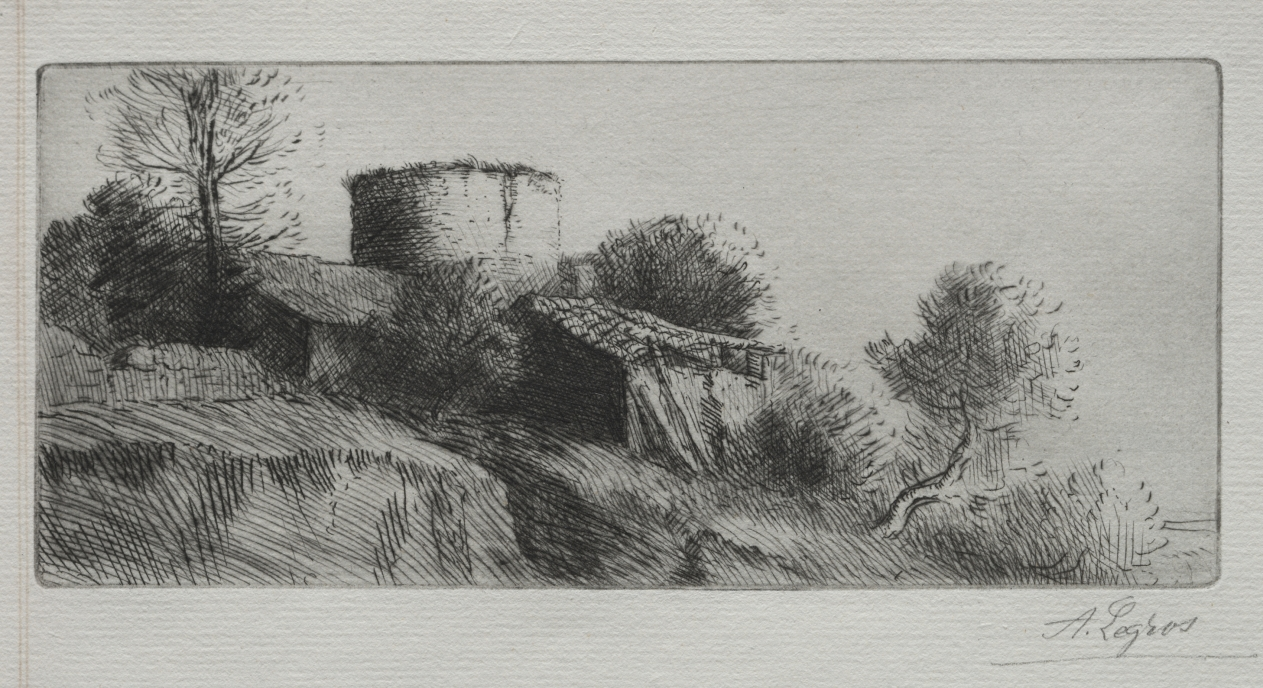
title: The Pigeon Tower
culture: France, 19th century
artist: Alphonse Legros (French, 1837–1911)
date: c. 1857–1911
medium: drypoint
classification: Print